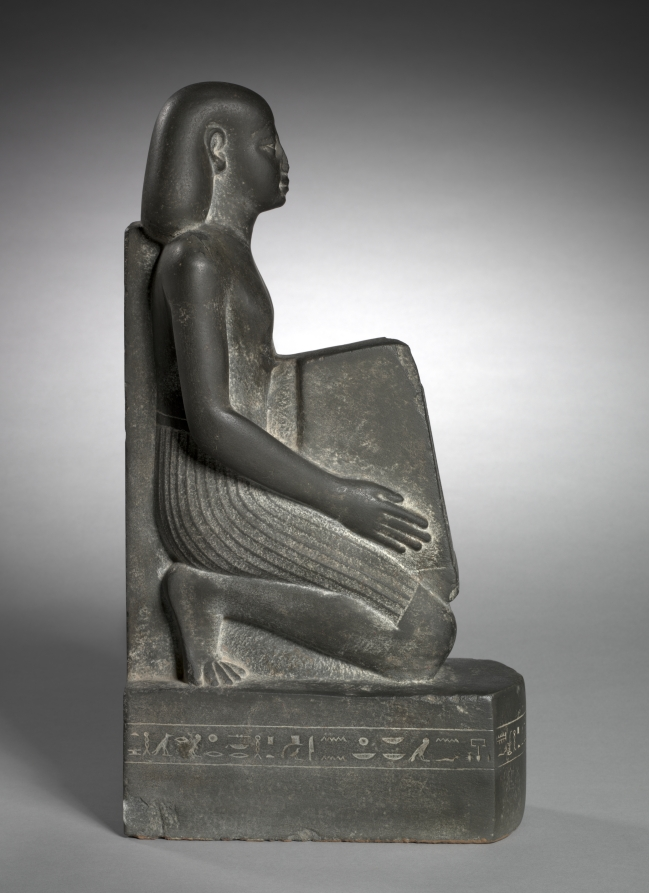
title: Naophorous Statue of the Finance Officer and Overseer of Fields, Horwedja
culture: Egypt, Late period (715–332 BCE), Dynasty 27, reign of Darius I (522–486 BCE)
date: 521–486 BCE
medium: graywacke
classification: Sculpture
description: Naophorous (naos.bearing) statues show the subject holding a naos, or shrine, containing an image of a deity, in this case the god Ptah of Memphis. These statues were very popular during the Late Period. Almost invariably they are of hard stone, made to last for eternity. As finance officer under Darius I, Horwedja was in a good position to afford such a monument. Darius I was the second Persian king to rule over Egypt and the only one who seems to have had a genuine appreciation of the country. Egypt prospered under his rule, and the arts flourished.